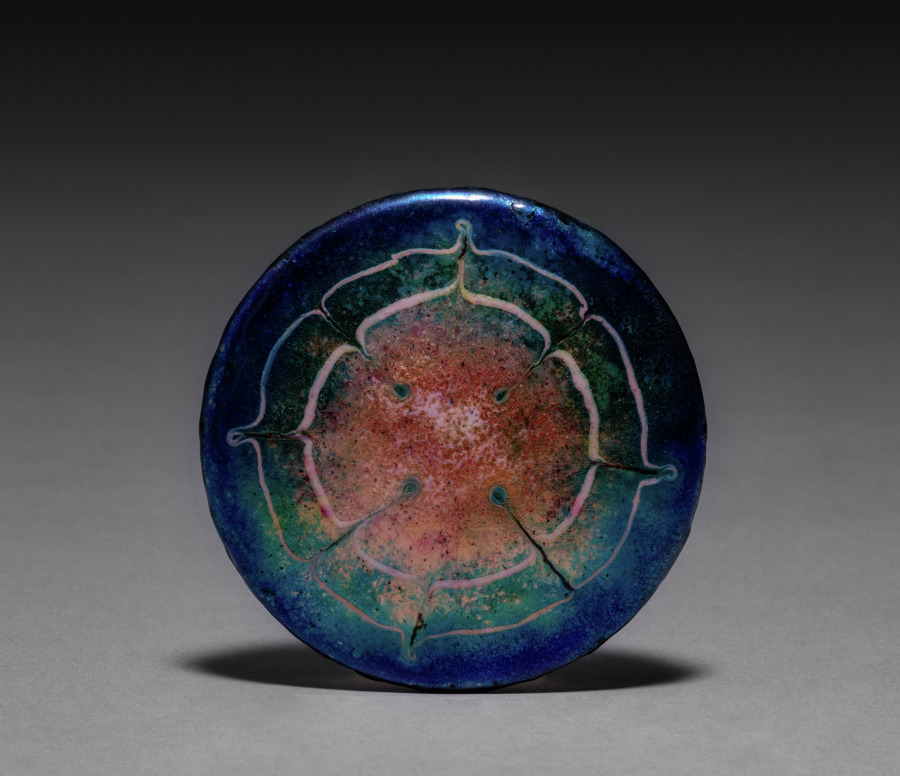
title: Cover for a Box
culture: America, New York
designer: Louis Comfort Tiffany (American, 1848–1933)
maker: Tiffany Glass & Decorating Company (America, New York, 1892–1902)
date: 1898–1901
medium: enamel on copper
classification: Glass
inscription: on bottom of glass box: 129 Louis C. Tiffany Favrile.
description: By 1900 Tiffany had expanded his empire by increasing the firm’s production of “fancy goods,” including inkstands, candlesticks, clocks, small boxes, desk sets, tea screens, and other functional objects. Along with the array of artistic glass designs from his factory in Corona, Queens, works in ceramic, bronze, other metals, and even jewelry abounded. These smaller, more affordable luxury items were designed with as much thought to artistry as the great stained glass windows and lamps through which the firm enjoyed unrivaled success.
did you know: Tiffany's artisans excelled at creating elaborate enameled patterns for luxurious accessories.